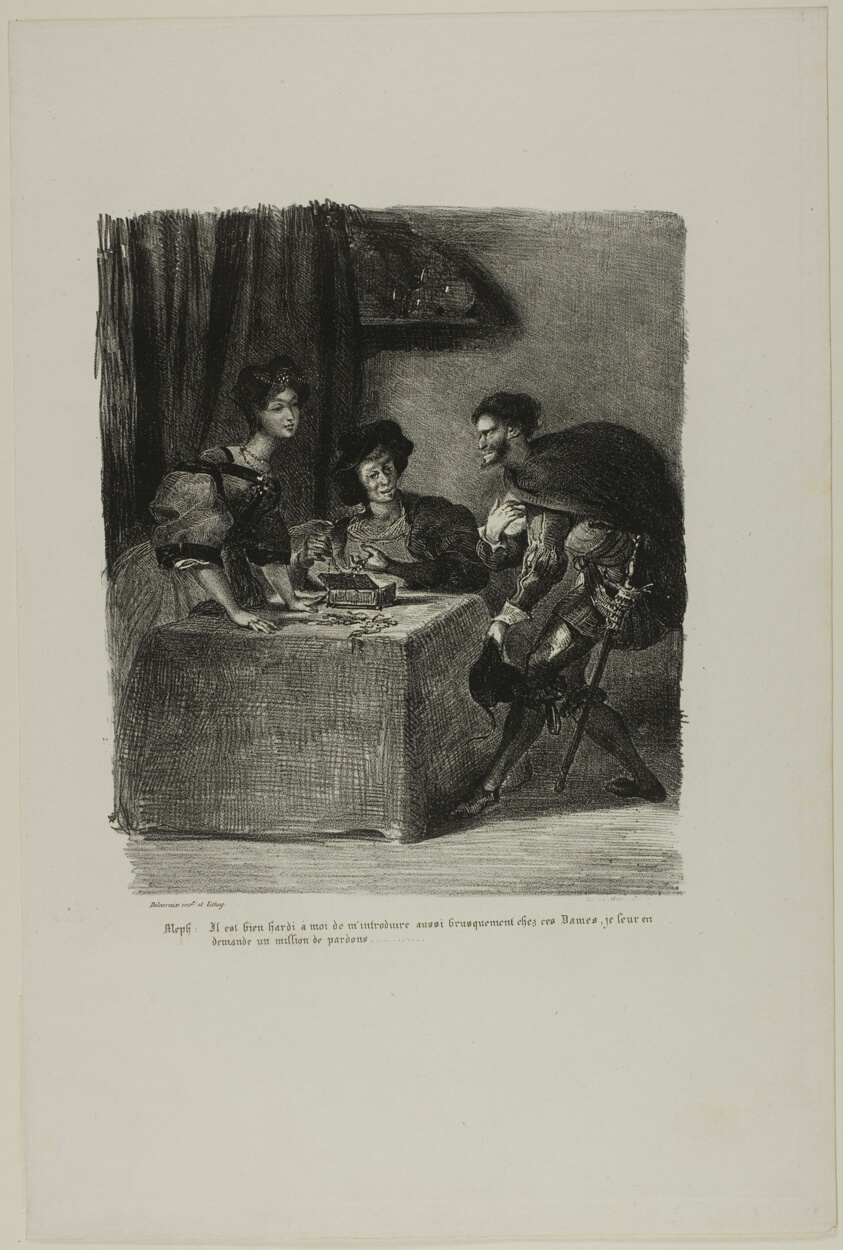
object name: Print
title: Mephistopheles Visits Martha, from Faust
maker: Eugène Delacroix (French, 1798-1863)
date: 1828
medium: Lithograph in black on white wove paper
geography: France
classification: lithograph; print; prints and drawing